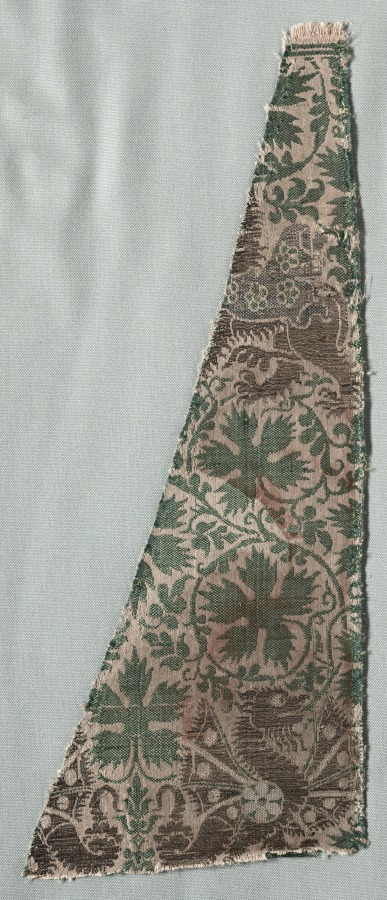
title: Silk Fragments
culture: Italy, Lucchese, second half of 14th century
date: 1350–99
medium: silk and gold thread: lampas weave, brocaded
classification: Textile